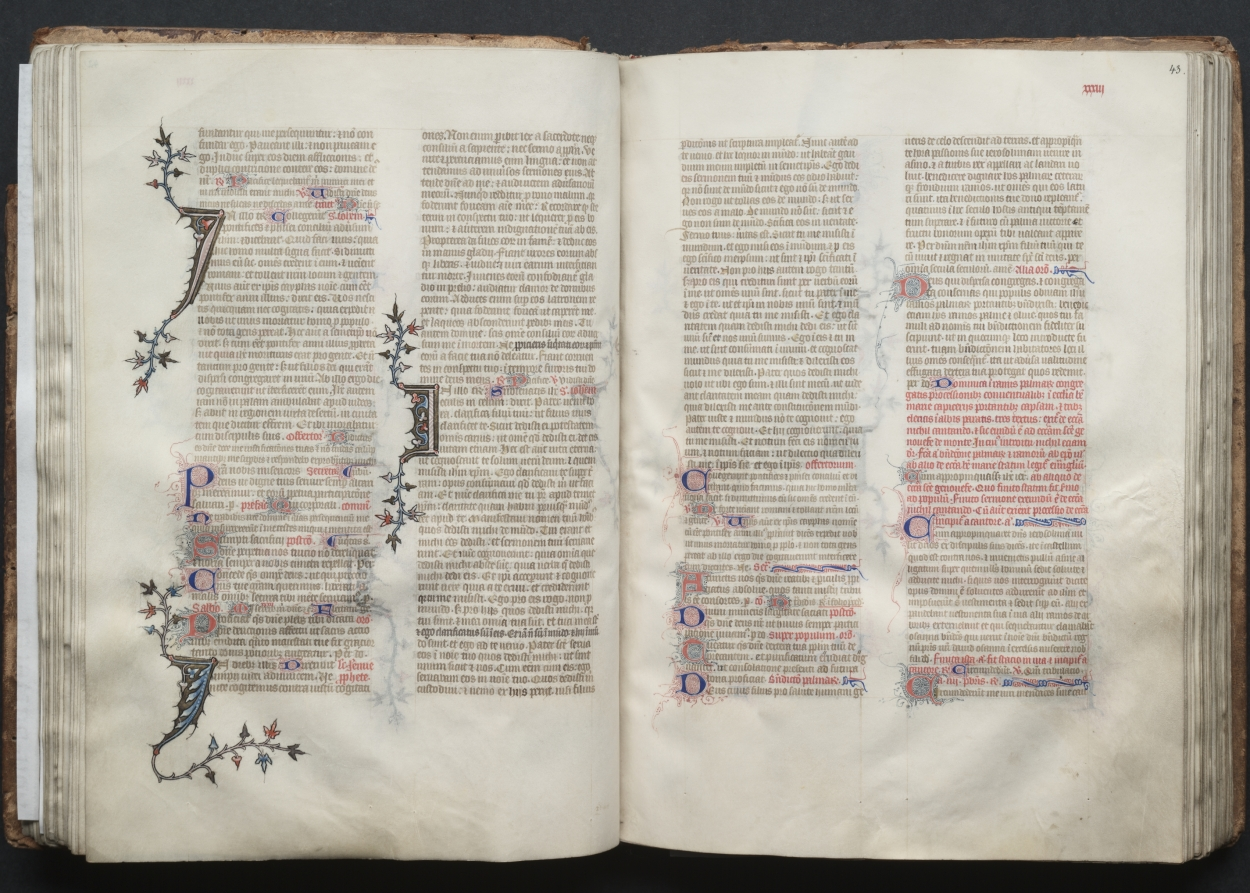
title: The Gotha Missal: Fol. 43r, Text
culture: France, Paris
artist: Master of the Boqueteaux (French)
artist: and Workshop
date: c. 1375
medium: ink, tempera, and gold on vellum; blind-tooled leather binding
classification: Bound Volume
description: The style and quality of this manuscript's decoration is typical of deluxe Parisian books made for aristocratic or royal patrons. Most of the book's decoration appears to be the work of the Master of the Boqueteaux, an artist active at the court of King Charles V (died 1380). His style was apparently shared by a number of book illuminators working in and around Paris. It is very possible that the Gotha Missal belonged to Charles V, but is not provable because the manuscript has no royal portraits and lacks a colophon. Given the book's magnificent decoration, however, it would seem that it was produced for a Valois prince, if not for the king himself. The manuscript receives its name from the German dukes of Gotha, its later owners.